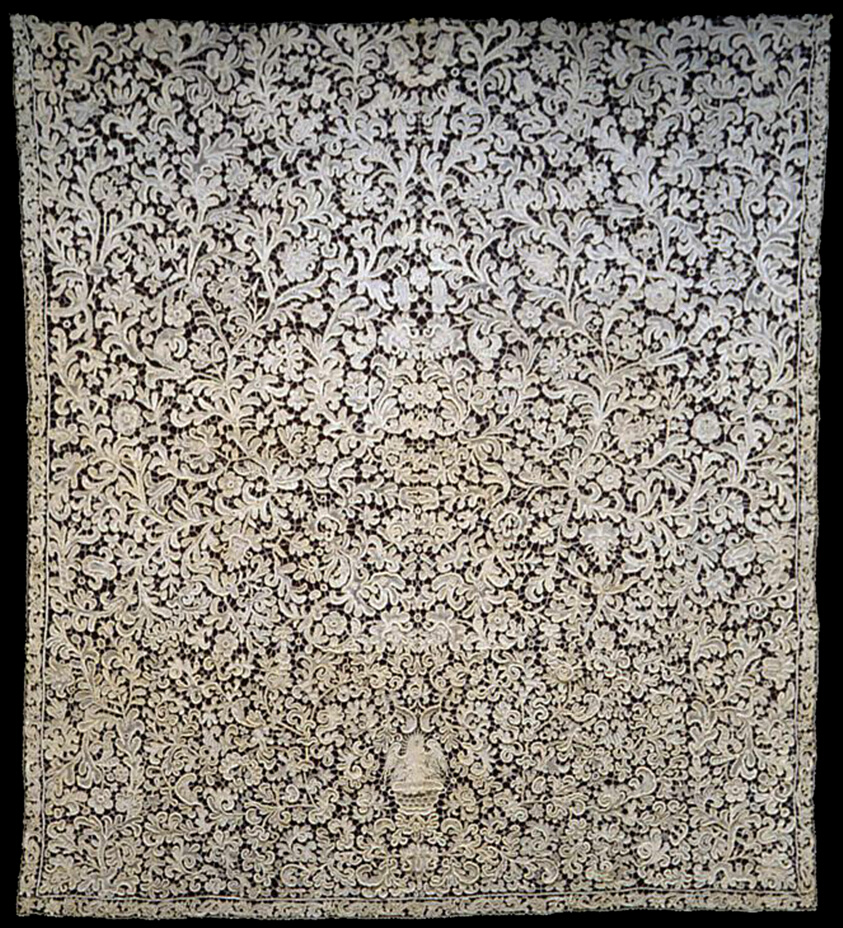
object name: Textile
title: Bedcover or Hanging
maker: Italy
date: 1701/25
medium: Linen, needle lace with woven tapes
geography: Italy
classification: textile; lace - needle